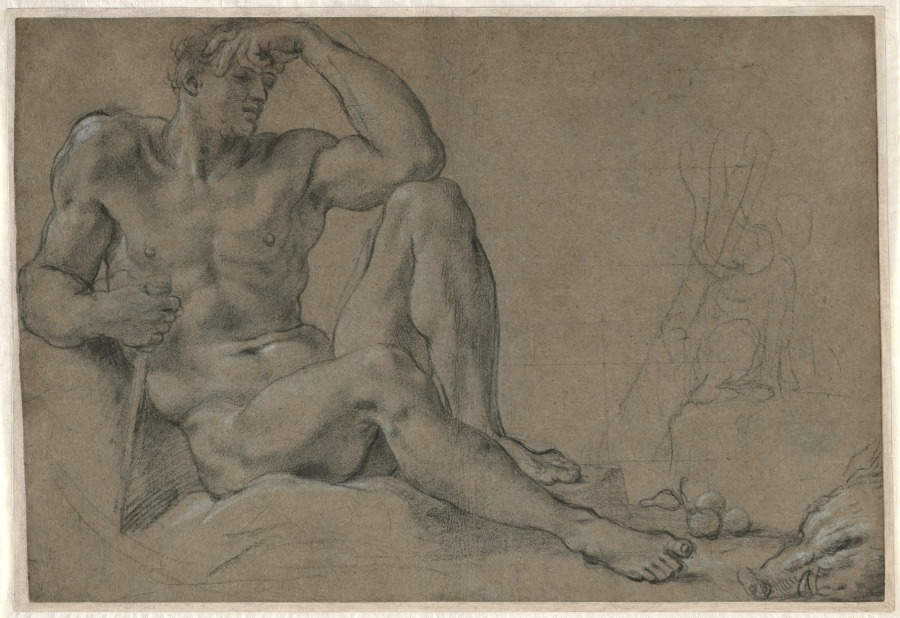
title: Hercules Resting (recto); Footed Vessel with Handle (verso)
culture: Italy, 16th century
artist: Annibale Carracci (Italian, c. 1560–1609)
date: 1595–97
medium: black chalk heightened with white, squared in black chalk on right, incised (edges of figure)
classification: Drawing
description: To atone for the crime of killing his family, the Greek hero Hercules was required to perform twelve labors. In this final study for a fresco of this subject commissioned by Cardinal Odoardo Farnese for the ceiling of his study in his family’s Roman palace, Hercules rests, surrounded by evidence of his toil: the head of the Erymanthian boar he captured; the three golden apples of the Hesperides; and the hide of the Nemean lion on which he sits. The hero’s pose and exaggerated musculature are a result of the artist’s intense study of ancient models, and emulate specific antique sculptures depicting river gods in the Farnese collection. Carracci also worked with full knowledge of Michelangelo’s frescoes on the Sistine Chapel ceiling (1508-10), and the pose of Hercules may have been inspired by the reclining figure of Adam in Michelangelo's Creation of Adam scene.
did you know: The squares drawn lightly over this composition suggest that it was used to transfer the design to another surface such as a full-scale cartoon.